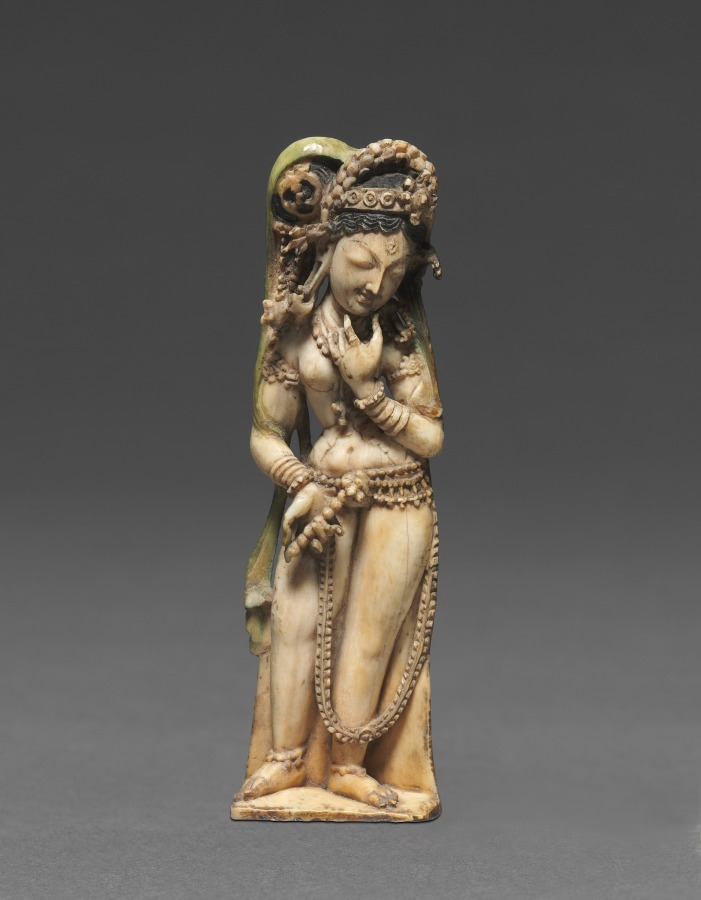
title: Female Attendants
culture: India, Kashmir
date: 700s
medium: ivory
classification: Ivory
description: These elegant female figures would have originally been in a portable, wooden shrine with a central ivory depicting the Buddha. One holds a chaurī, or flywhisk, a frequent attribute of attendants, while the one originally on the left holds a lotus. Both display a graceful contraposto (tribhanga). Their rich jewelry contrasts successfully with the softness of their flesh.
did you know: Traces of turquoise paint remain on their bodies, suggesting the presence of fabric.